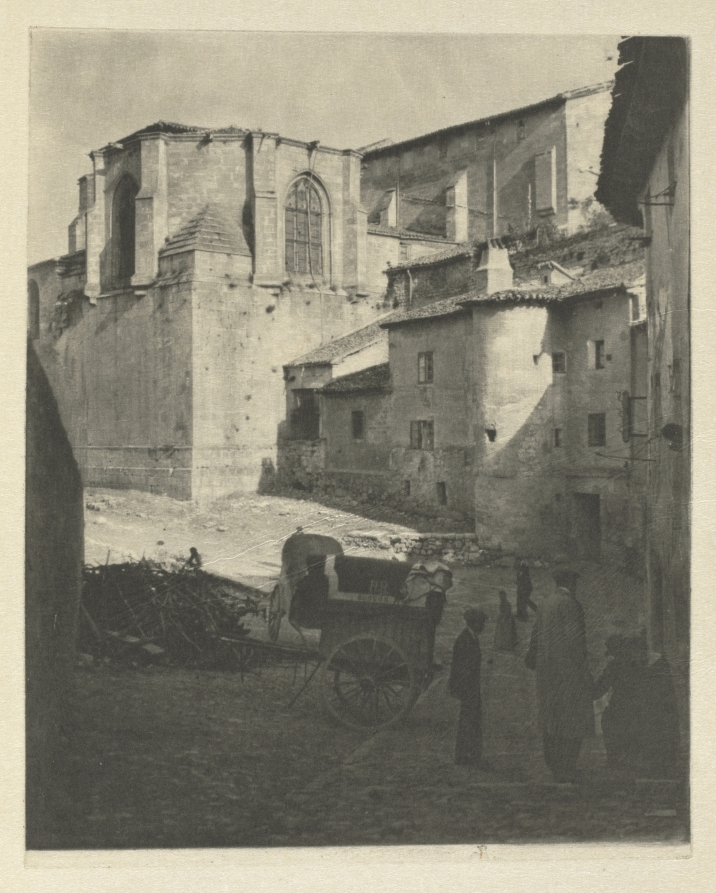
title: Camera Work: Old Church - Burgos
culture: England, 20th century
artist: J. Craig Annan (British, 1864–1946)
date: 1914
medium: photogravure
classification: Bound Volume